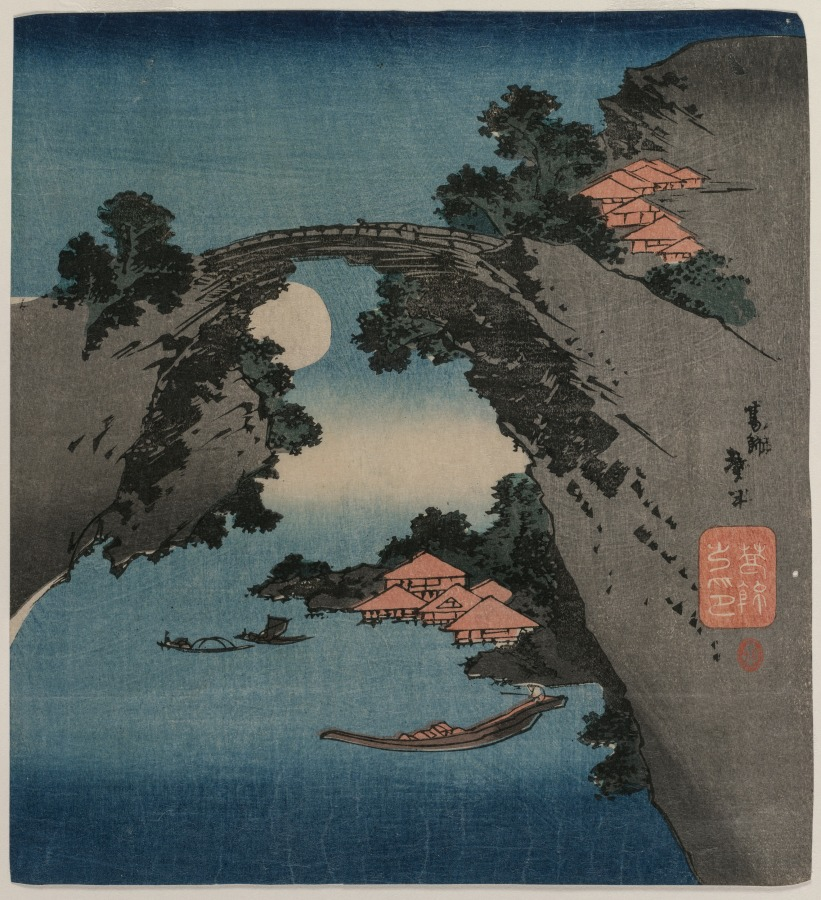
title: The Monkey Bridge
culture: Japan, Edo period (1615–1868)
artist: Katsushika Taito II (Japanese, active c. 1810–50s)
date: early 1830s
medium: color woodblock print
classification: Print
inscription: Signature: Katsushika Taito 葛飾戴斗 Artist Seal: Katsushika no in 葛飾の印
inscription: Collector's seal: ぶろんど, "burondo" (Blondeau)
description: Taito II, who studied with Hokusai, created this image of the Monkey Bridge in Kai Province, west of Tokyo. By depicting the moon beneath the narrow bridge, he emphasized the height of the gorge. Before it was given to the museum by one of its founders, Jeptha H. Wade, this print was trimmed. Uncut versions of the same scene include a section with a poetic inscription designed to look like a rubbing from a stone stele, or commemorative marker, often erected in scenic locations. Ink was also applied differently to produce varying effects in other impressions.